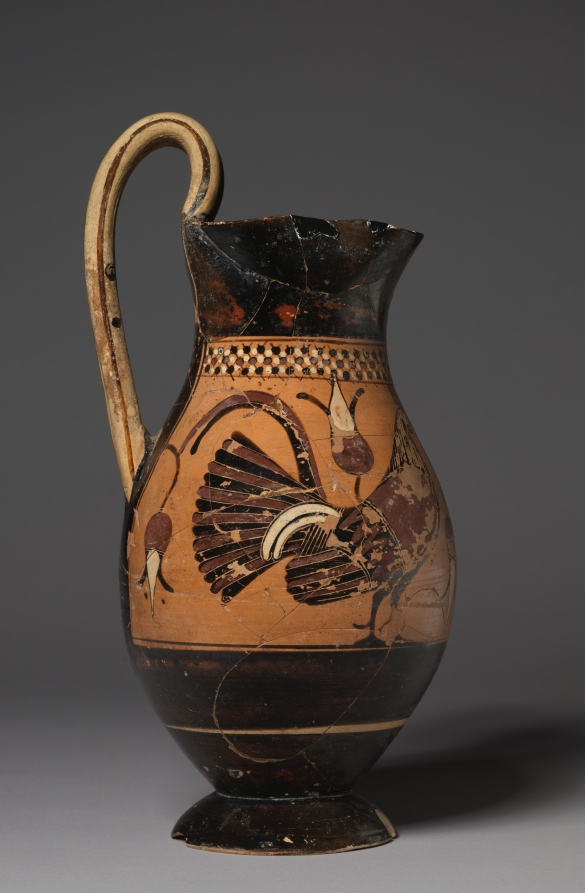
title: Black-Figure Olpe (Wine Jug): Rooster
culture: Greek, Middle/Late Corinthian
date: c. 575 BCE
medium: ceramic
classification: Ceramic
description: Although this wine jug, simply decorated with a rooster and two lotus blossoms, looks much like Athenian vases, it was made in Corinth. The paler buff color of the Corinthian clay can be seen on the handle and in some areas of loss, but the background of the decorated area has been covered with a red slip imitating the reddish, iron-rich Attic (or Athenian) clay. On the back of the vase, two reserved (red) crescent shapes may represent eyes, like those painted in much more detail on many drinking cups of this period.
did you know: Roosters appear frequently on vases—alone, in cock fights, and as love gifts.